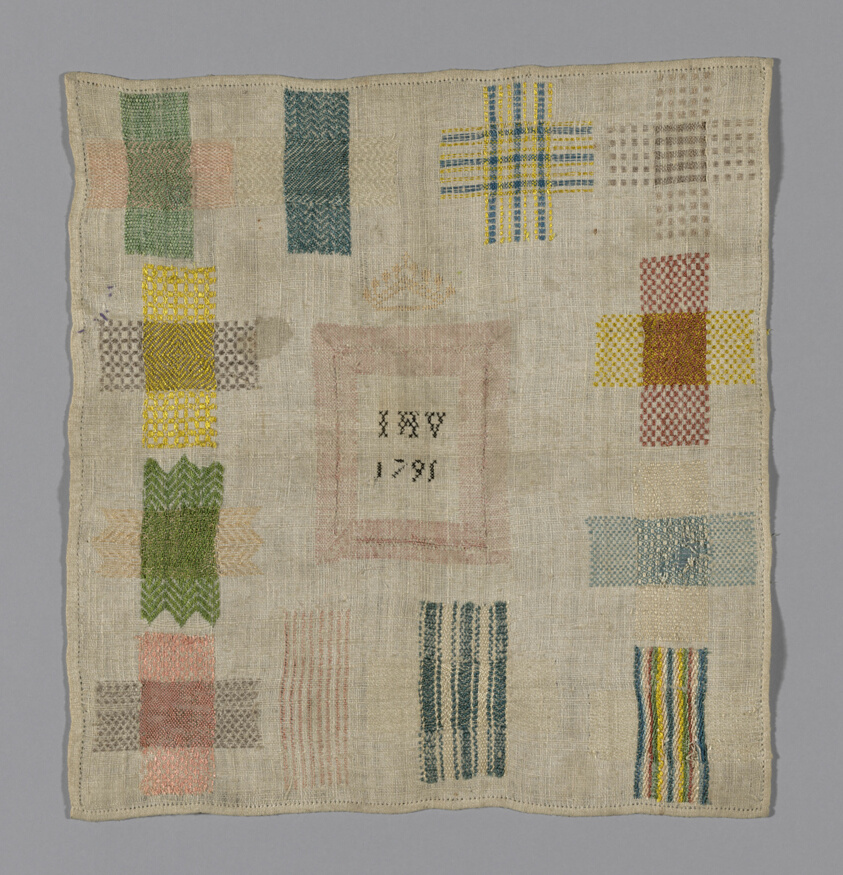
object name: Textile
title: Darning Sampler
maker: Netherlands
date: 1791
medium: Twelve samples of darning in colored silk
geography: Netherlands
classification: textile; needlework (visual works); weaving; sampler